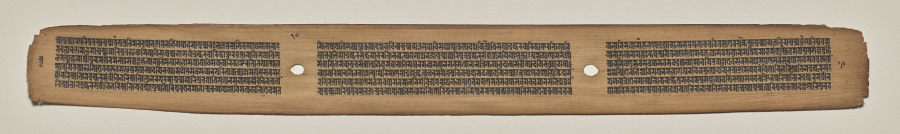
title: Text, Folio 10 (verso), from a Manuscript of the Perfection of Wisdom in Eight Thousand Lines (Ashtasahasrika Prajnaparamita-sutra)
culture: Eastern India, Bihar, Vikramashila Monastery. Painting: Nepal, Kathmandu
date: Sunday, September 14, 1119 (year 239 of the Newar Samvat in the month of Ashvina)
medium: gum tempera and ink on palm leaves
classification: Painting